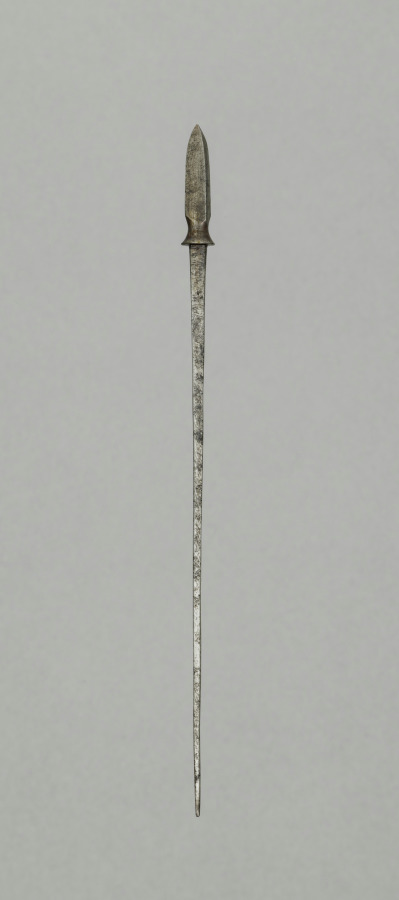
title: Arrow Point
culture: Japan, Edo period (1615–1868)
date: 1700s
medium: steel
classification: Arms and Armor